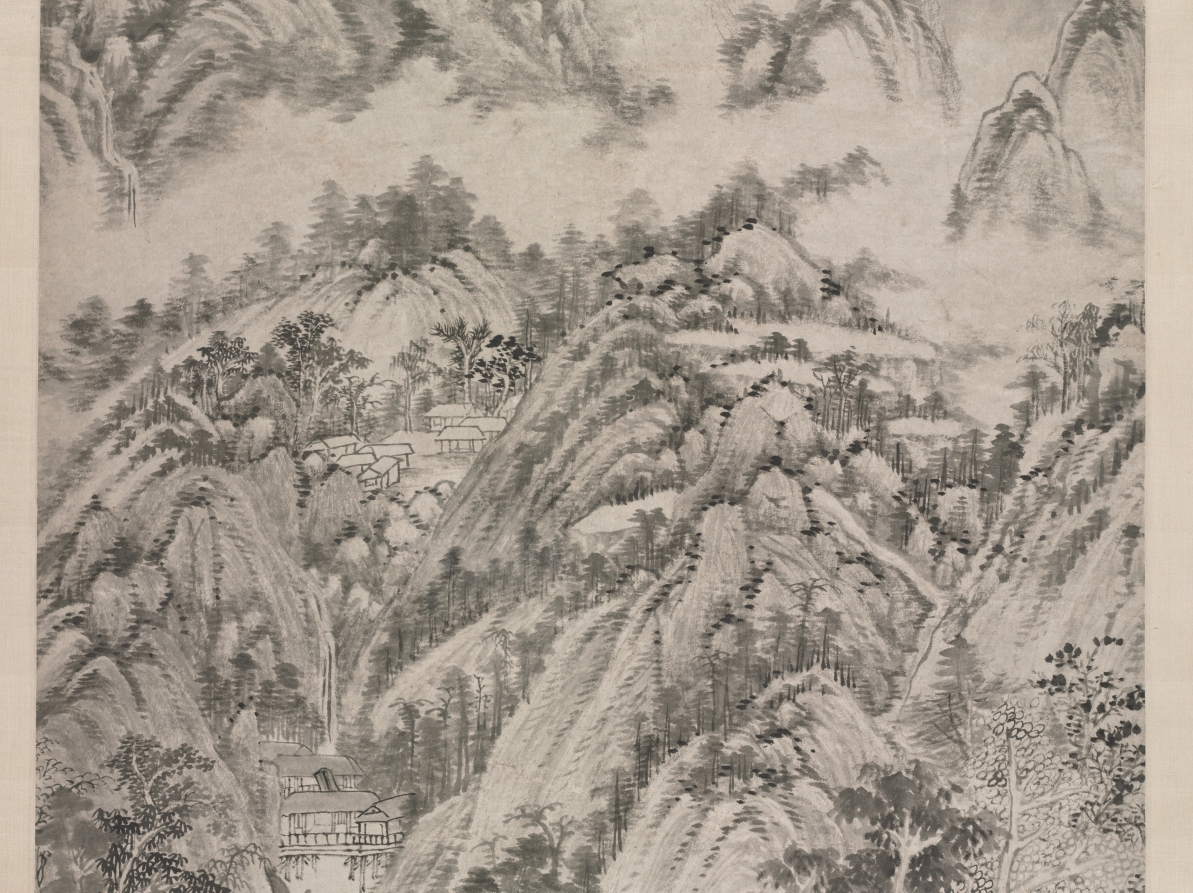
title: Mountain Village Embraced by the Summer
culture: China, Qing dynasty (1644-1911)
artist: Wang Shimin (Chinese, 1592–1680)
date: 1659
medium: hanging scroll, ink on paper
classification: Painting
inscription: Artist's inscription, signature, and 3 seals: [seal] Ouxie 偶諧. In the jihai year [1659], the fourth lunar month, I painted this for T'o-weng, my senior in our literary club, for your amusement and correction. Your junior Wang Shimin. [seals] Wang Shimin yin 王時敏印; Xunzhi 遜之.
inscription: 2 additional seals: 1 of Jiang Gusun [Chiang Ku-sun] 將穀孫 (20th century); 1 of C. C. Wang 王季遷 (1907–2003).